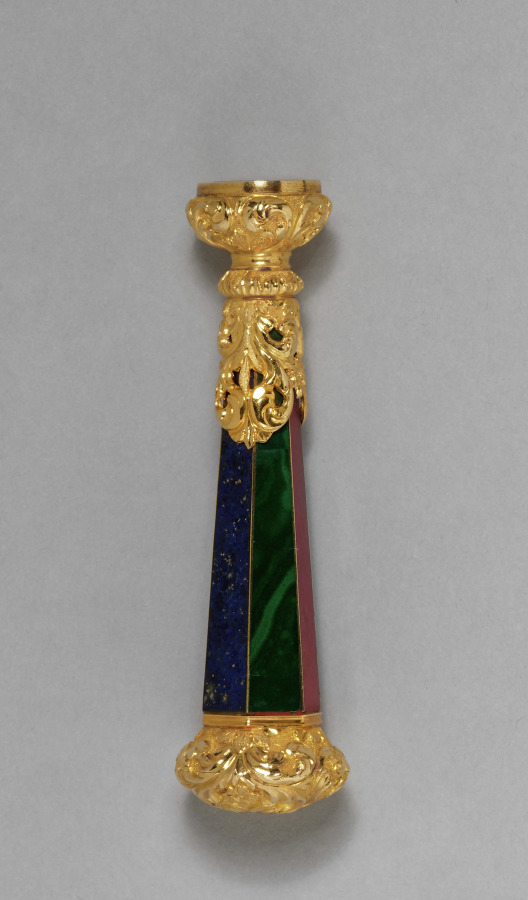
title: Seal from a Writing Set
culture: England, mid-19th century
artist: John Hamilton Mortimer (British, 1740–1779)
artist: and Paul Storr (British, 1771–1844)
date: c. 1830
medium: hardstones including lapis lazuli, malachite, carnelian, agate, gold; original fitted velvet-lined case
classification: Miscellaneous